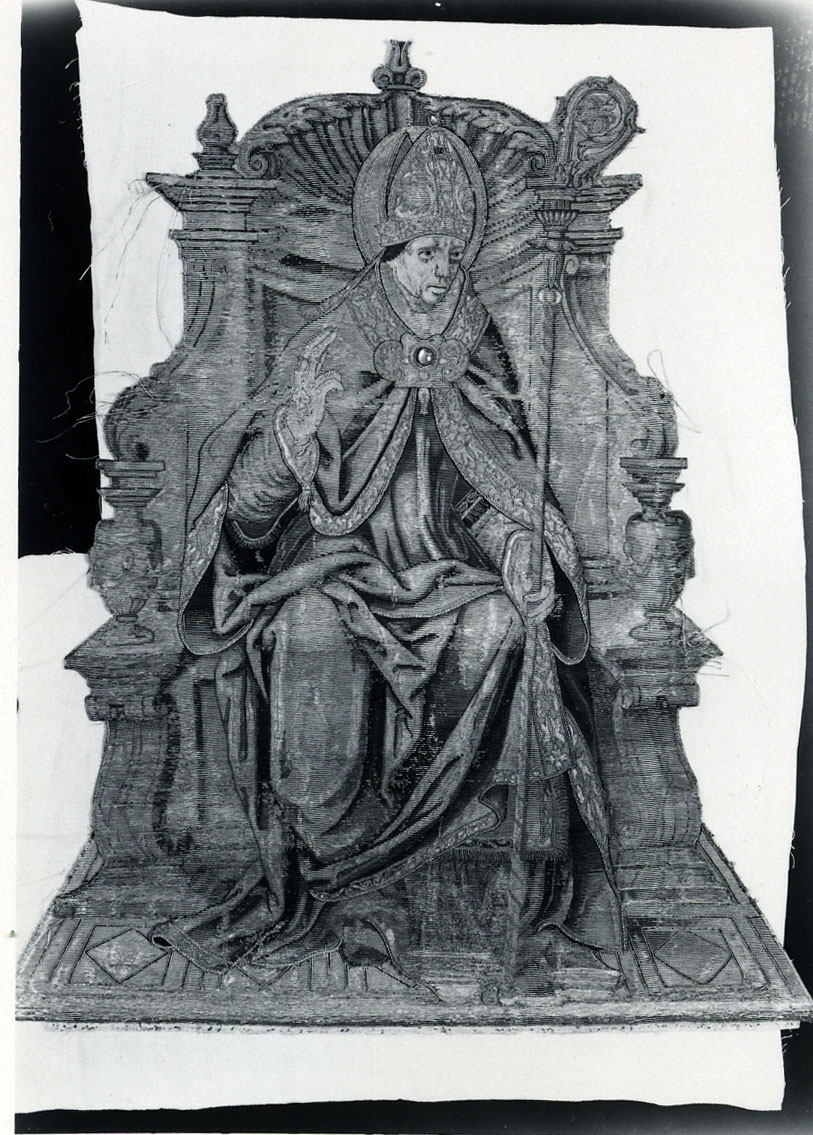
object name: Textile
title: Fragment (from Altar Frontal)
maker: Spain, La Seo de Urgel, Lérida, Catalonia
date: 16th century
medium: Silk, velvet; cut pile; embroidered with gold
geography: Catalonia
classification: textile; needlework (visual works); altar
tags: altar